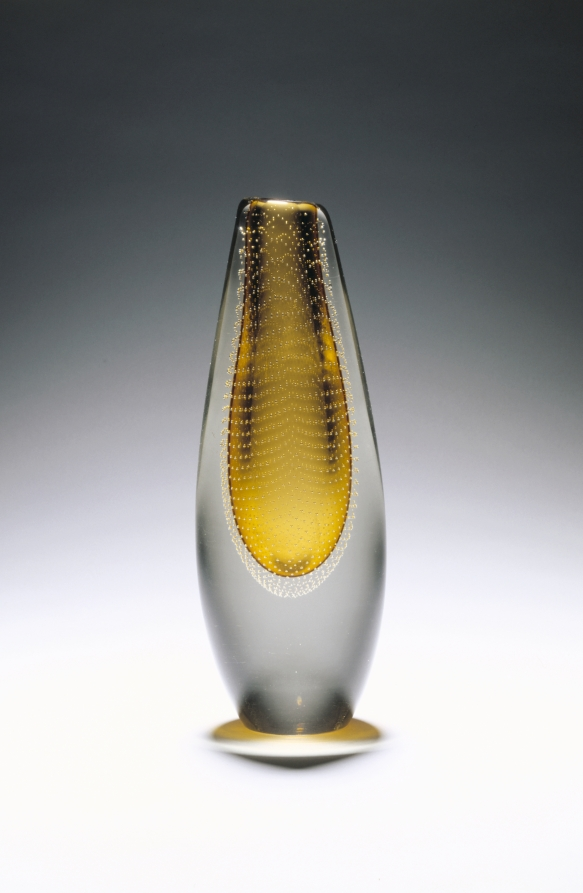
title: Vase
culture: Finland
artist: Gunnel Nyman (Finnish, 1909–1948)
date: 1950s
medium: glass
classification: Glass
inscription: inscribed on bottom: NYMAN/NUUTAJARVI/NOTSJO-(3?)(9?).